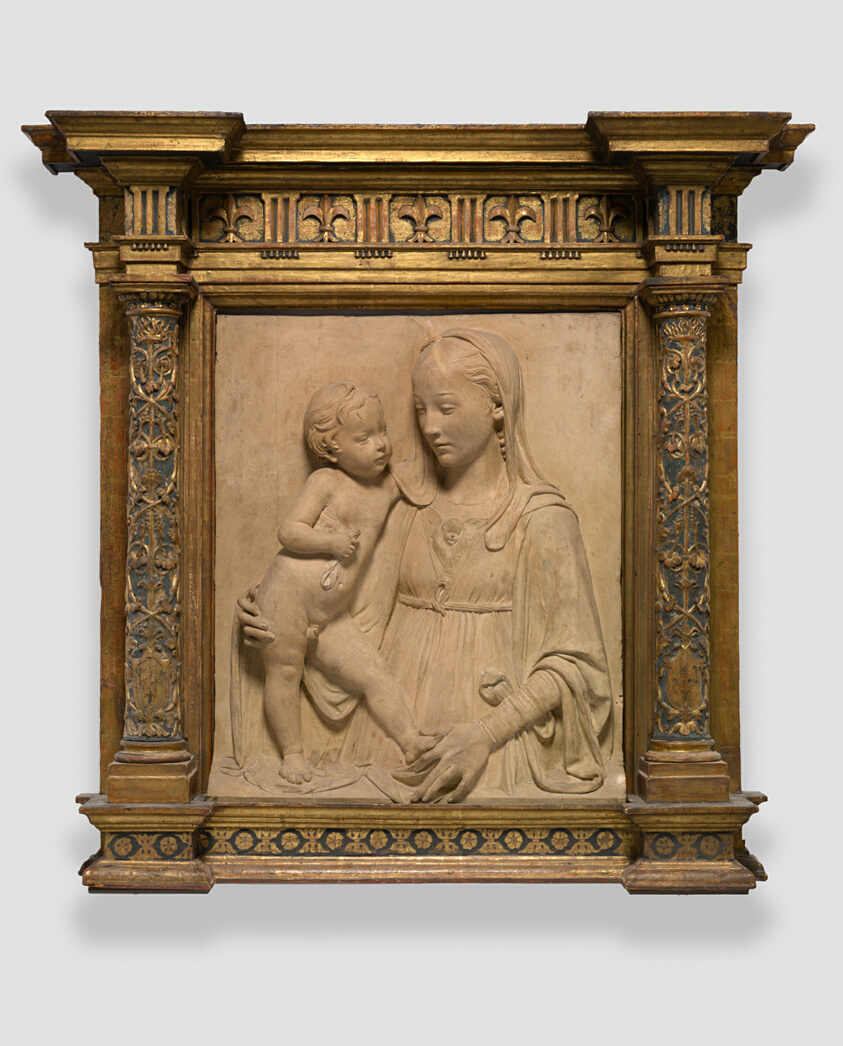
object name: Sculpture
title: Madonna and Child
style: Renaissance, 15th century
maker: Antonio Rossellino (Italian, 1427–1479)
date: c. 1475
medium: Terracotta with traces of polychromy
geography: Italy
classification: relief; sculpture; Italian; terracotta (sculpture)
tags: Virgin and child/Madonna and child, Devotion, religious figures, religious, religion, Christian subjects, Christianity, mother and child, mother, mothers, sons, boys, child, Jesus, Virgin Mary